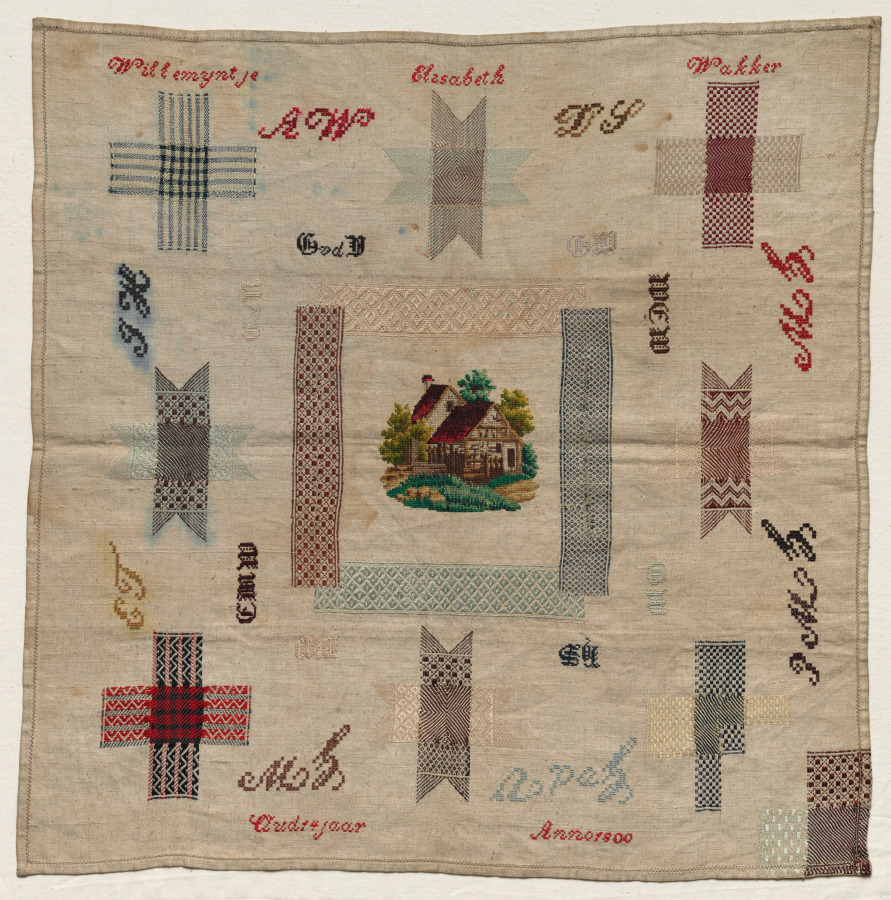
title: Darning Sampler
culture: Netherlands, early 19th century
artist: Willemijntje Elisabeth Wakker (Dutch, b. 1875)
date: c. 1880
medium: Silk on linen, embroidery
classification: Sampler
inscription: initials symmetrically spaced around central design of a house. Top: "Willemyntje Elisabeth Wakker"; bottom: " Oud 14 jaar Anno 1800."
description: Orphaned as a child, Willemijntje was sent to the Burgerweeshuis (Citizen's Orphanage) in Amsterdam along with her three sisters. While there, she embroidered her own name along the top edge.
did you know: On their samplers the orphans often embroidered the initials of relatives.